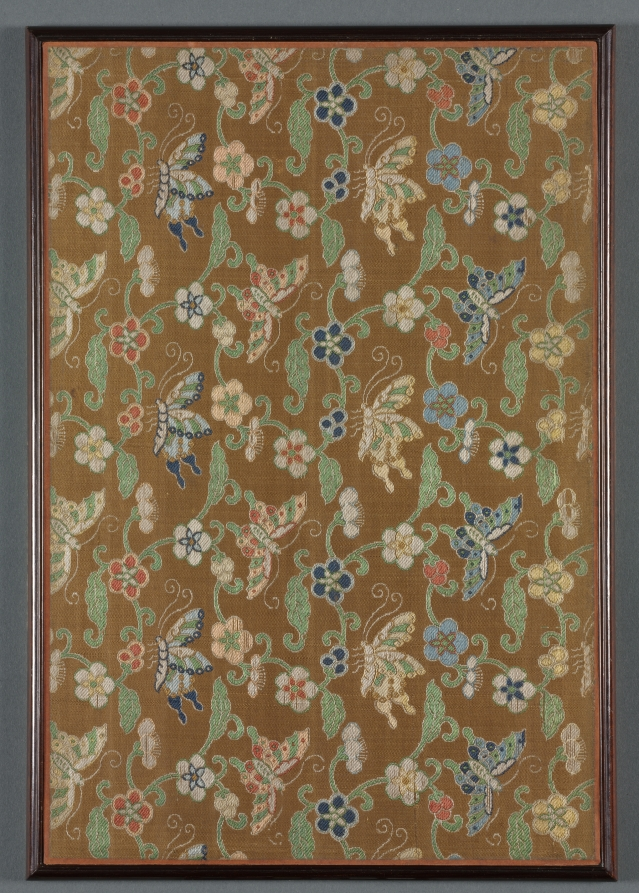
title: Album of Seasonal Landscapes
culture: China, Qing dynasty (1644-1911)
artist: Xiao Yuncong (Chinese, 1596–1673)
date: 1668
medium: Album of eight leaves; ink and light color on paper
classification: Painting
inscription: Artist's inscription, signature, and seals on each leaf.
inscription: 9 additional seals: 2 of Chen Yixi 陳奕禧 (1646-1709); 4 of Li Yufen 李玉棻 [Li Yunhu 李韵湖] (active mid-1800s); 3 unidentified.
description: Throughout his lifetime, Xiao Yuncong visited Nanjing and Yangzhou, cities embedded in the fertile and water-rich Jiangnan region, as reflected in his paintings. Xiao painted from nature, and his landscapes are informed by the seasons and his travels, as well as by his experience as a print designer. Xiao’s fresh, light colors continue to appear in later Shanghai school paintings. This album was formerly in the collection of Li Yufen in Yangzhou and then owned by Wu Hufan in Shanghai. While the artist impressed his seal consistently below his poetic inscriptions in the upper parts of the composition, the red seals on the margins and in the lower corners of the paintings are impressions by the album’s previous owners.